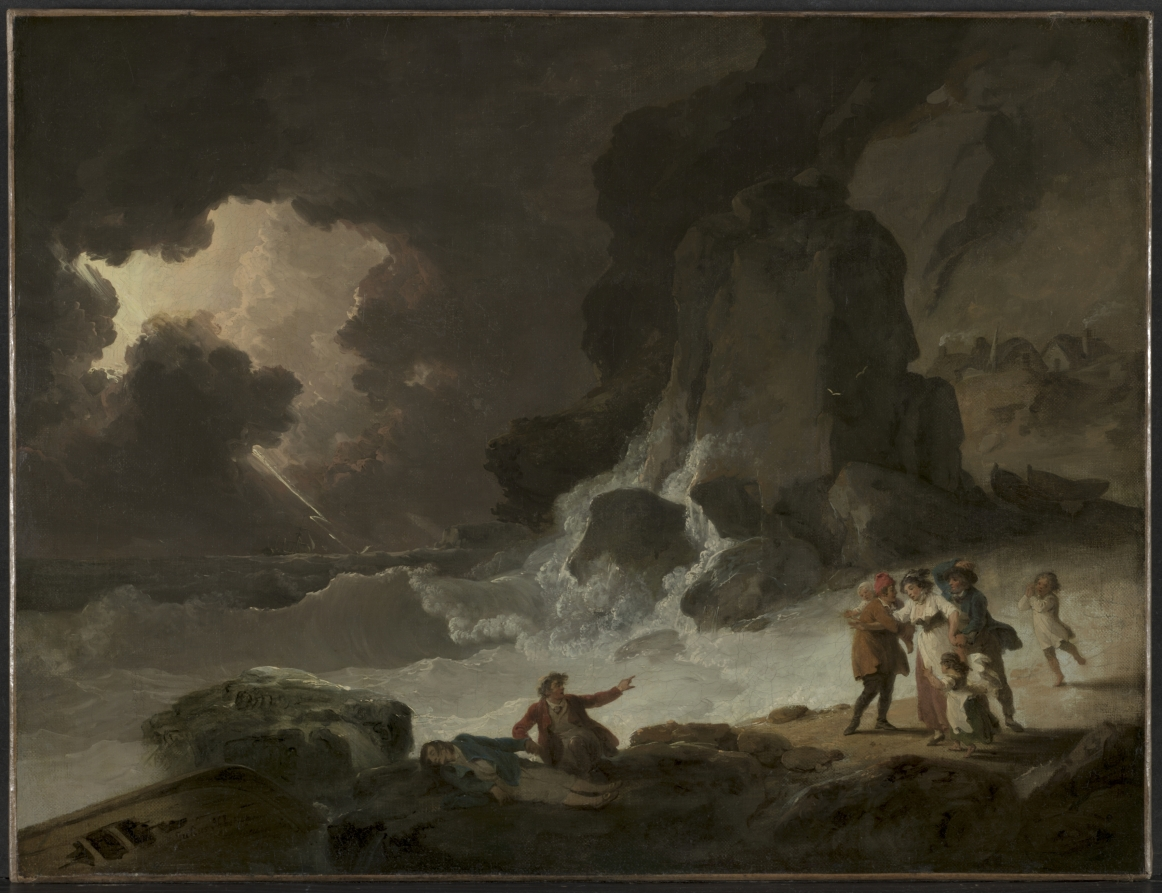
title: A Storm Behind the Isle of Wight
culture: England, 18th century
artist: Julius Caesar Ibbetson (British, 1759–1817)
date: c.179(?)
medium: oil on canvas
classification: Painting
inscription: Signed lower left: "Julius Ibbetson / [...] / 179[...]"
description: The scene depicts a family's distress upon finding that one of its members has drowned off the rocky shore of the Isle of Wight during a storm. A ship sinks in the wild sea, amid swirling dark clouds and lightning flashes. The artist had visited the Isle of Wight in 1791. Ibbetson began his career by copying Dutch landscape paintings for dealers. He is known to have produced copies and fakes in the style of other masters as well.